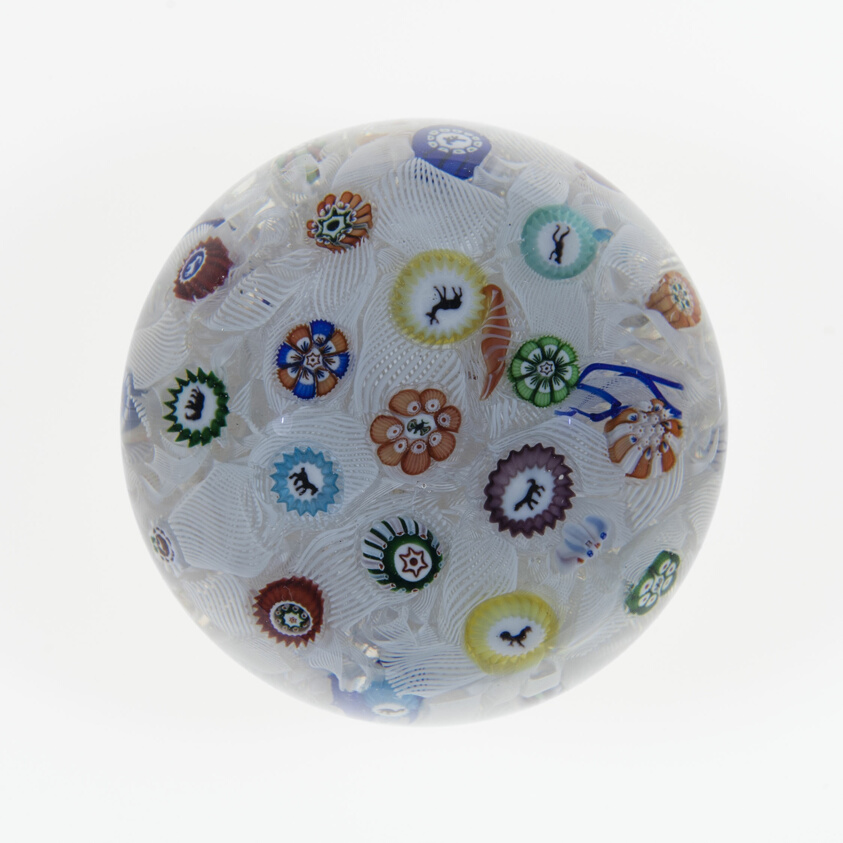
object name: Glass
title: Paperweight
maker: Baccarat Glassworks (Cristalleries de Baccarat); Lorraine, France, founded 1764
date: 1848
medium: Glass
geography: Baccarat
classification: paperweight; glass